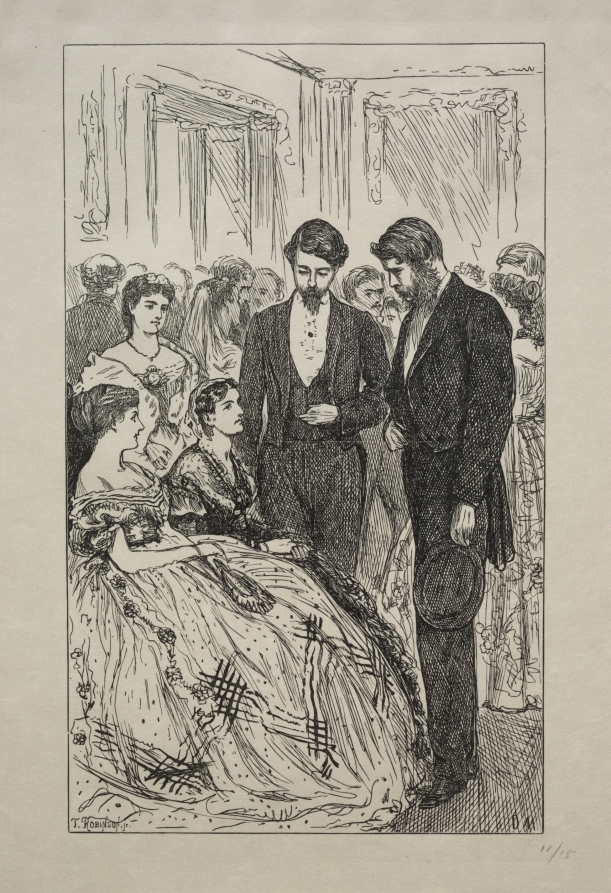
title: Much Ado about Nothing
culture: England, 19th century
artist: George Louis Palmella Busson Du Maurier (British, 1834–1896)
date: 1866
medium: wood engraving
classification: Print